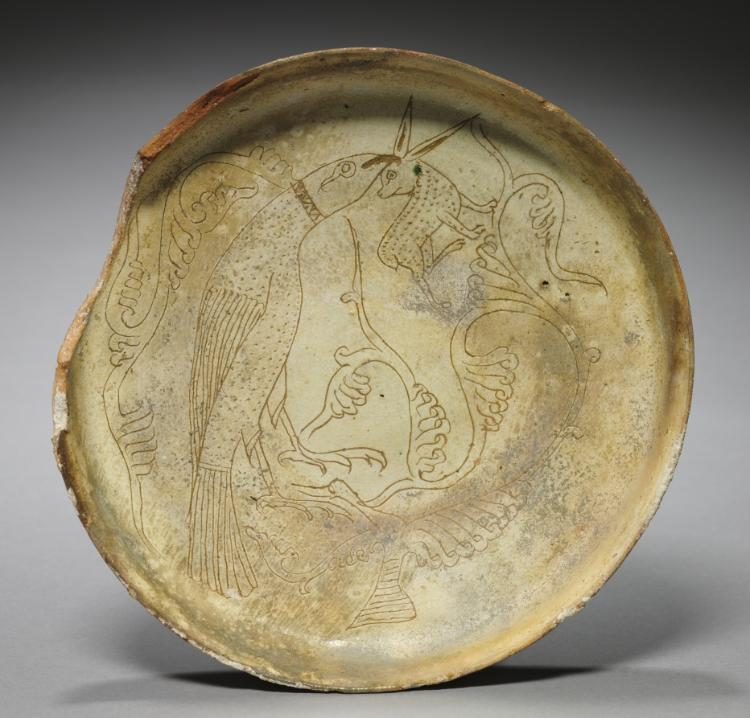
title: Deep Plate with Hawk, Rabbit, and Foliage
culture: Byzantium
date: 1100s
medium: sgraffito earthenware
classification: Ceramic